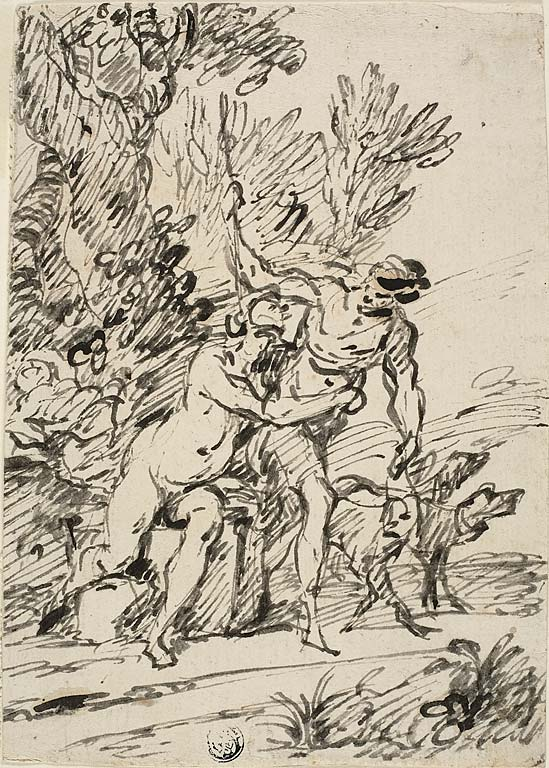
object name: Drawing and Watercolor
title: Venus and Adonis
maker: Domenico Gargiulo; Italian, 1612-1675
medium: Pen and brush and black ink, on ivory laid paper, tipped on to ivory laid paper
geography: Italy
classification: pen and ink drawings; drawings (visual works); prints and drawing